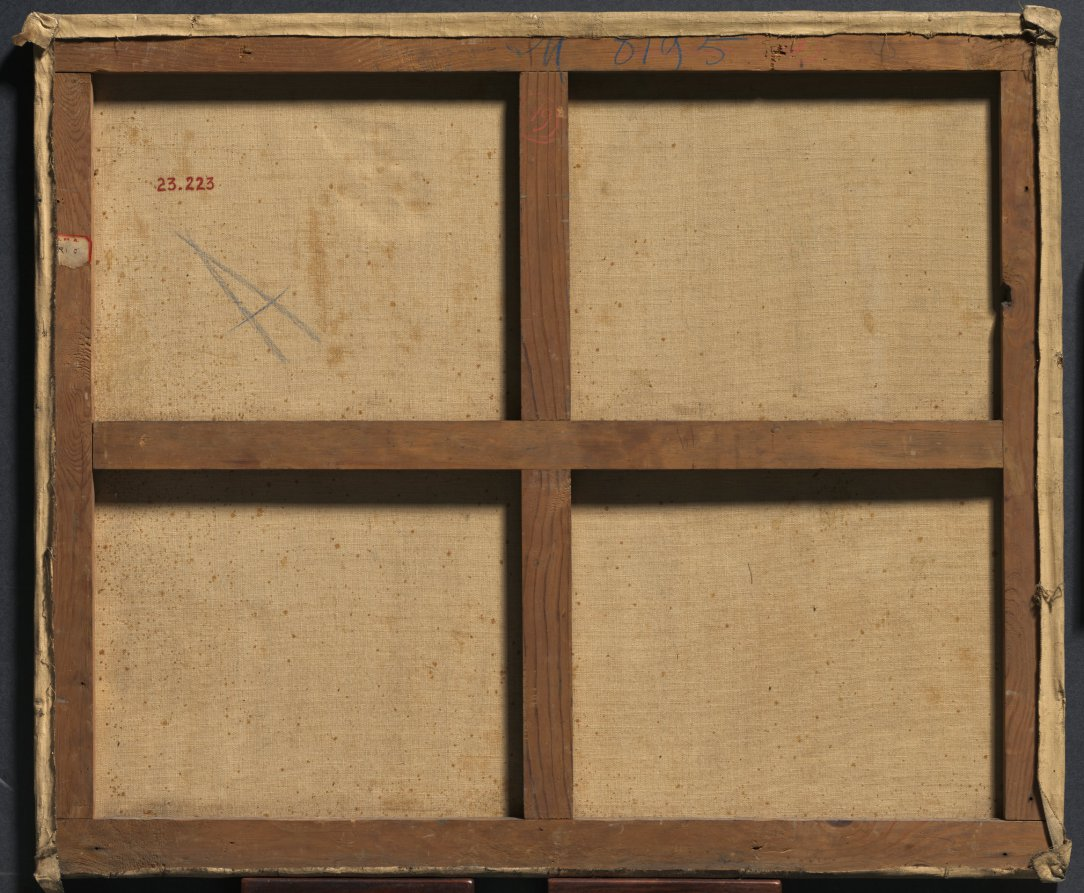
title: Interior of a School Coranique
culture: Algeria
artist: Si Azouaou Mammeri (Algerian, 1890–1954)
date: 1900s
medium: oil on canvas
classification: Painting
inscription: signed lower right: Mammeri